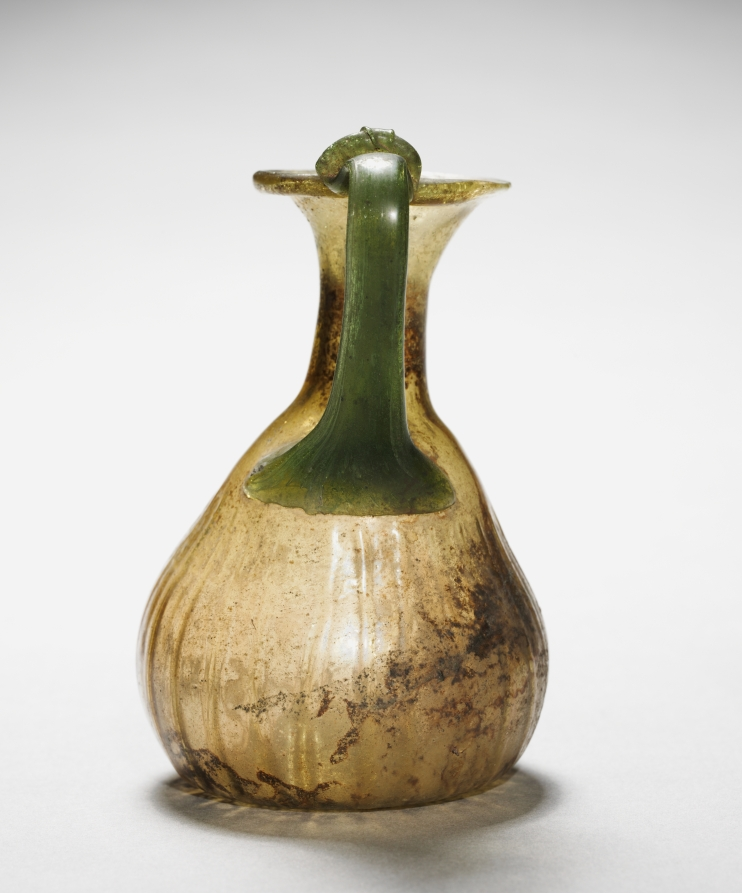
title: Pitcher with Handle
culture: Syro-Palestinian, Roman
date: 300s CE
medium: glass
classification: Glass